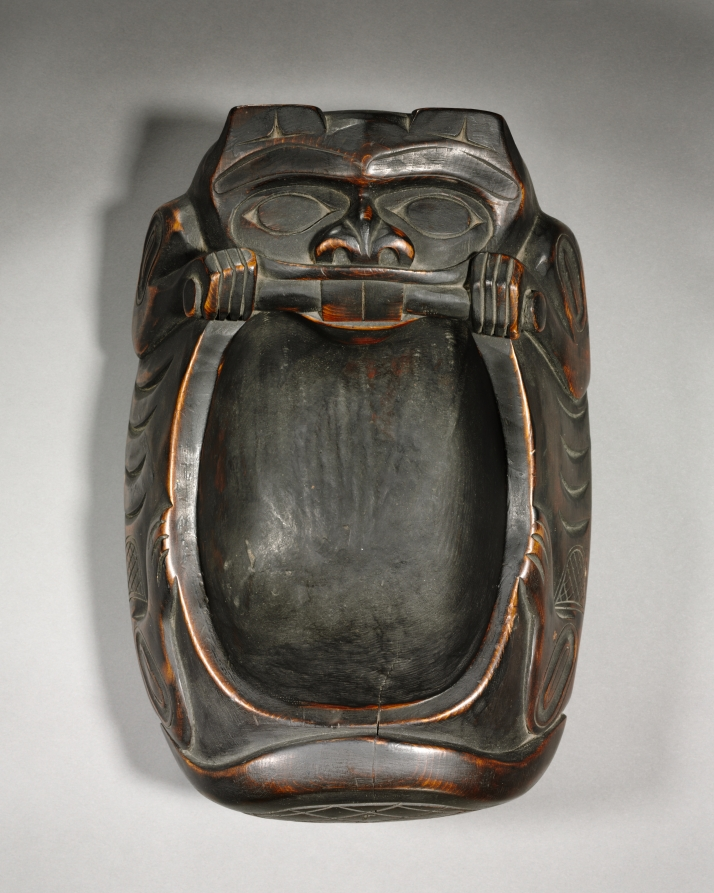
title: Beaver-Shaped Bowl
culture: Native North America, Northwest Coast, Alaska, Tlingit?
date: c. 1890–1920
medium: wood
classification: Wood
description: Bowls were a major Northwest Coast art form, used in many contexts including potlatch feasts that validated the rights and privileges of wealthy noble families. When Euro-American settlement forced a change from traditional to cash economies in the early 1900s, Indigenous carvers turned their skills to creating bowls like this example for the outside market.